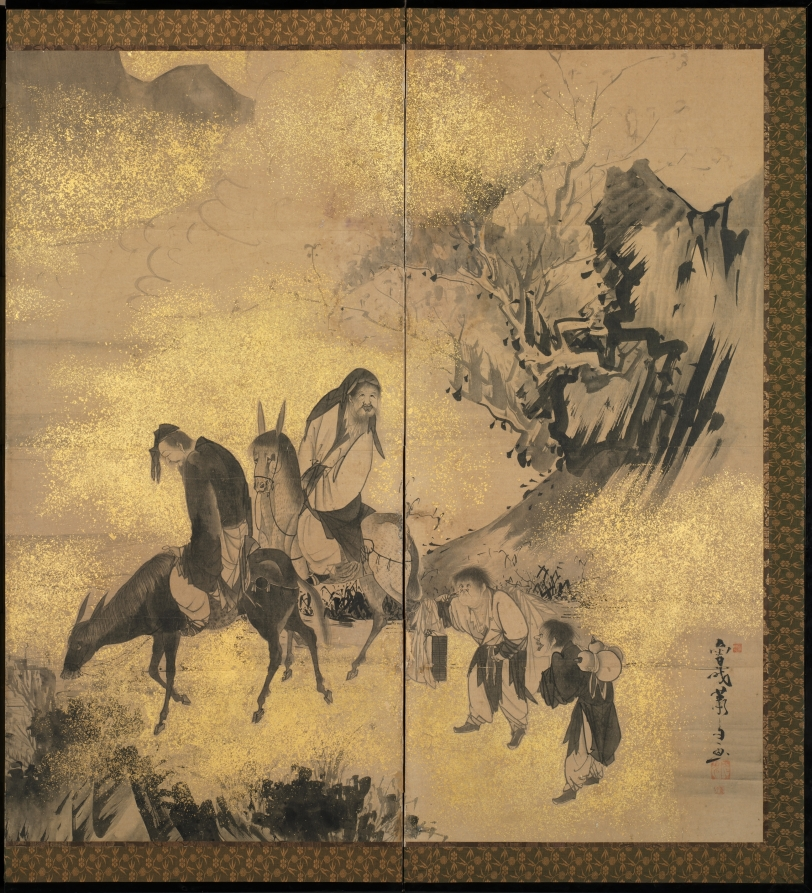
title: The Eight Immortals of the Wine Cup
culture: Japan, Edo period (1615–1868)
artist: Soga Shōhaku (Japanese, 1730–1781)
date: later 1700s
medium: Six-panel folding screen, ink and cut-gold foil on paper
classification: Painting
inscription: signature, lower right corner.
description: Responding to the desires of the middle class (chonin), some Japanese painters of the late Edo period moved away from the seriousness associated with the Chinese theme of reclusion, focusing instead on the motif’s humorous aspects. The theme Eight Immortals of the Wine Cup is based on a poem by the renowned 8th-century Chinese poet Du Fu about his eight colleagues. These scholars eagerly sought release from their official governmental duties and then supposedly fled the capital for the countryside. There, they engaged in wildly eccentric behavior and adventurous creative work, all fueled by copious amounts of wine. Shohaku’s version of events exaggerates the scholars’ pleasure, as seen in their comical facial expressions.